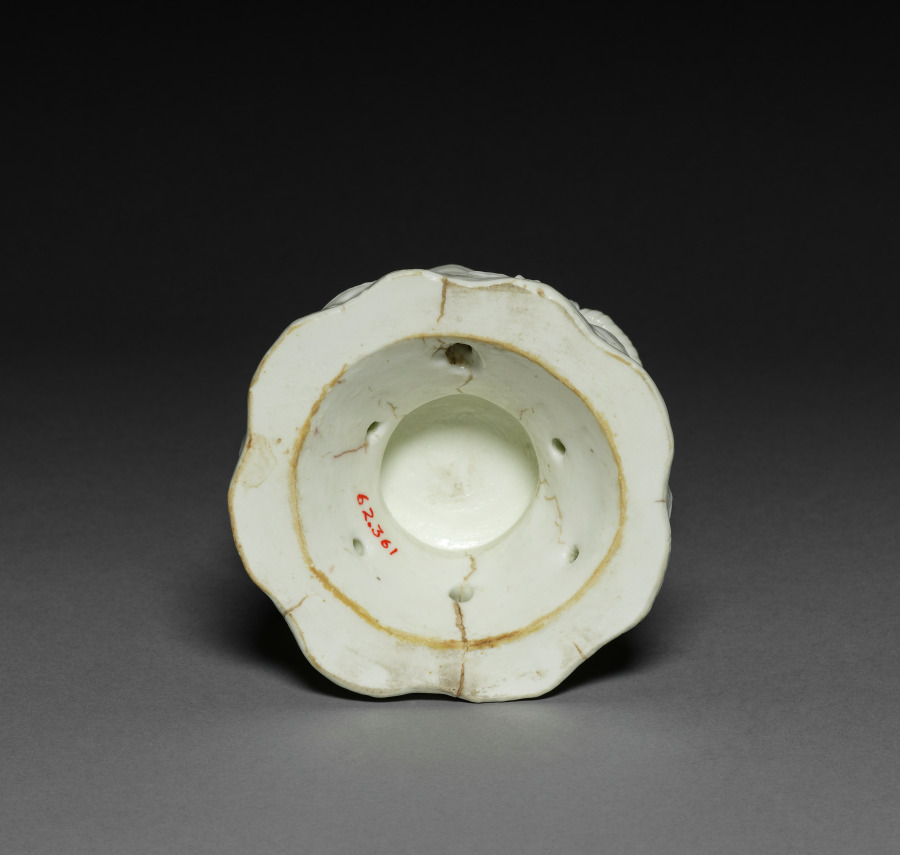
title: Potpourri Vase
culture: France, Saint Cloud, 18th century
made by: Saint Cloud Porcelain Factory (French)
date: mid 1700s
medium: soft-paste porcelain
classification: Ceramic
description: A vase like this was created to contain potpourri, a mixture of flowers, herbs, and spices emitting ambient fragrance. This specific function offered a particularly fertile ground for the development of French porcelain, as manufactories experimented with forms, surface ornamentations, and placement of perforations.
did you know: Prior to Saint-Cloud's development of soft-paste porcelain in the 1690s, rumors spread throughout Europe that the prized material was made by burying a variety of materials, including lobster shells, in the ground for 80 years.